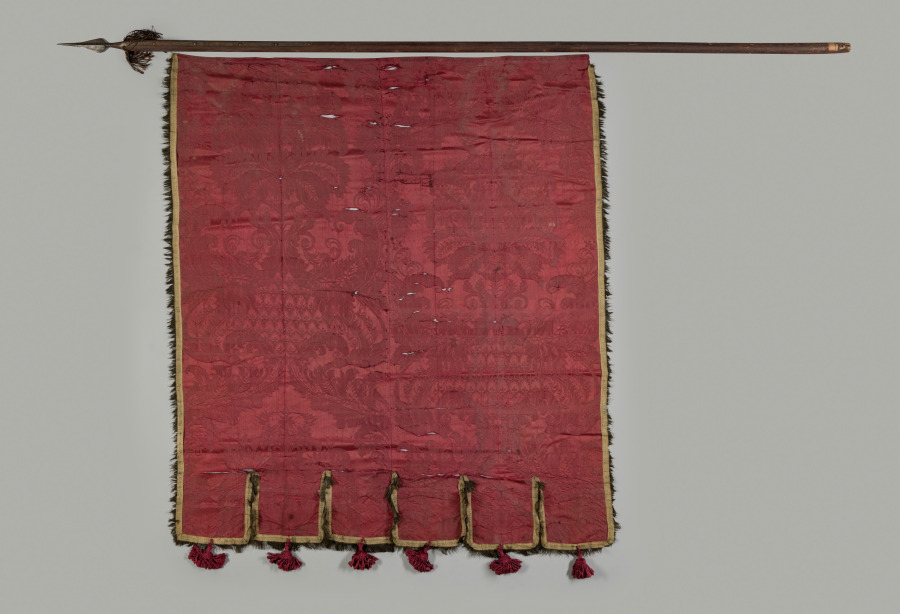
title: Banner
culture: Spain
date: 1700s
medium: crimson silk brocade; scalloped border with fringe and tassels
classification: Textile